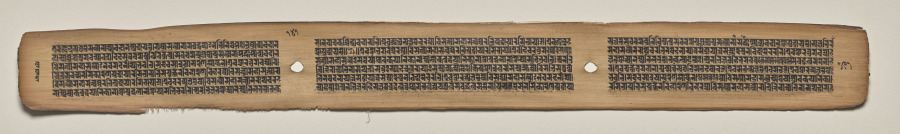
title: Text, Folio 141 (verso), from a Manuscript of the Perfection of Wisdom in Eight Thousand Lines (Ashtasahasrika Prajnaparamita-sutra)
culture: Eastern India, Bihar, Vikramashila Monastery. Painting: Nepal, Kathmandu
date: Sunday, September 14, 1119 (year 239 of the Newar Samvat in the month of Ashvina)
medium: gum tempera and ink on palm leaves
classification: Painting